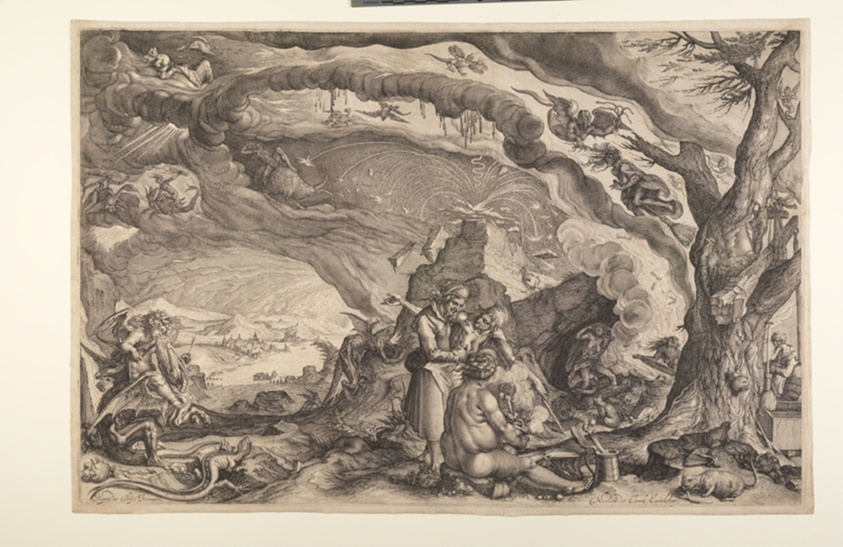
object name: Print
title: Witches Preparing for Sabbath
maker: Attributed to Andries Stock (Netherlandish, 1572/82-after 1648); after Jacques de Gheyn II (Dutch, 1565–1629)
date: c. 1610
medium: Engraving on ivory laid paper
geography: Netherlands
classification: engraving; paper; print; prints and drawing